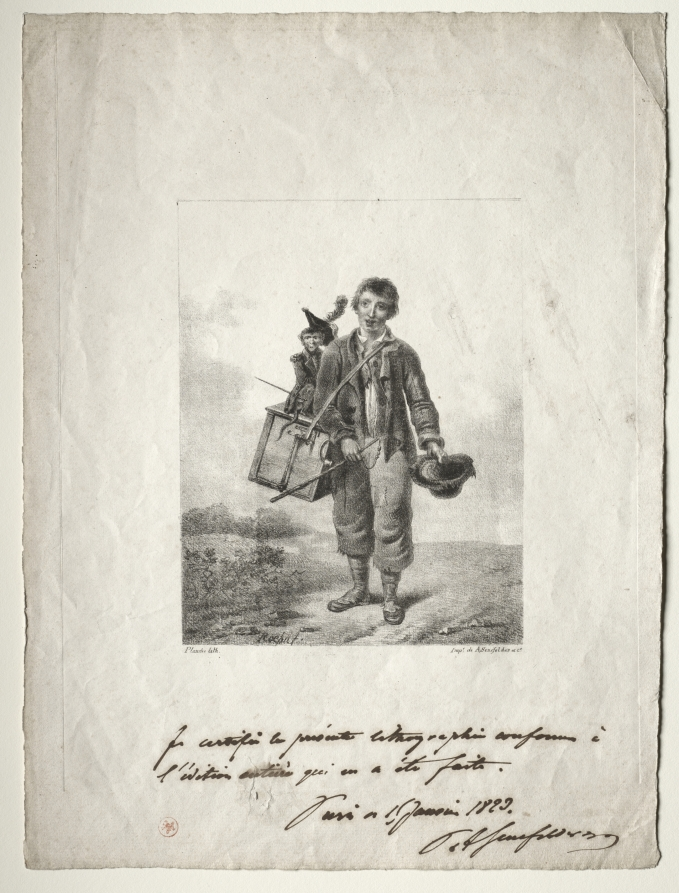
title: Organ-Grinder Boy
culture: Germany, 19th century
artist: Alois Senefelder (German, 1771–1834)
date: 1829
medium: lithograph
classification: Print